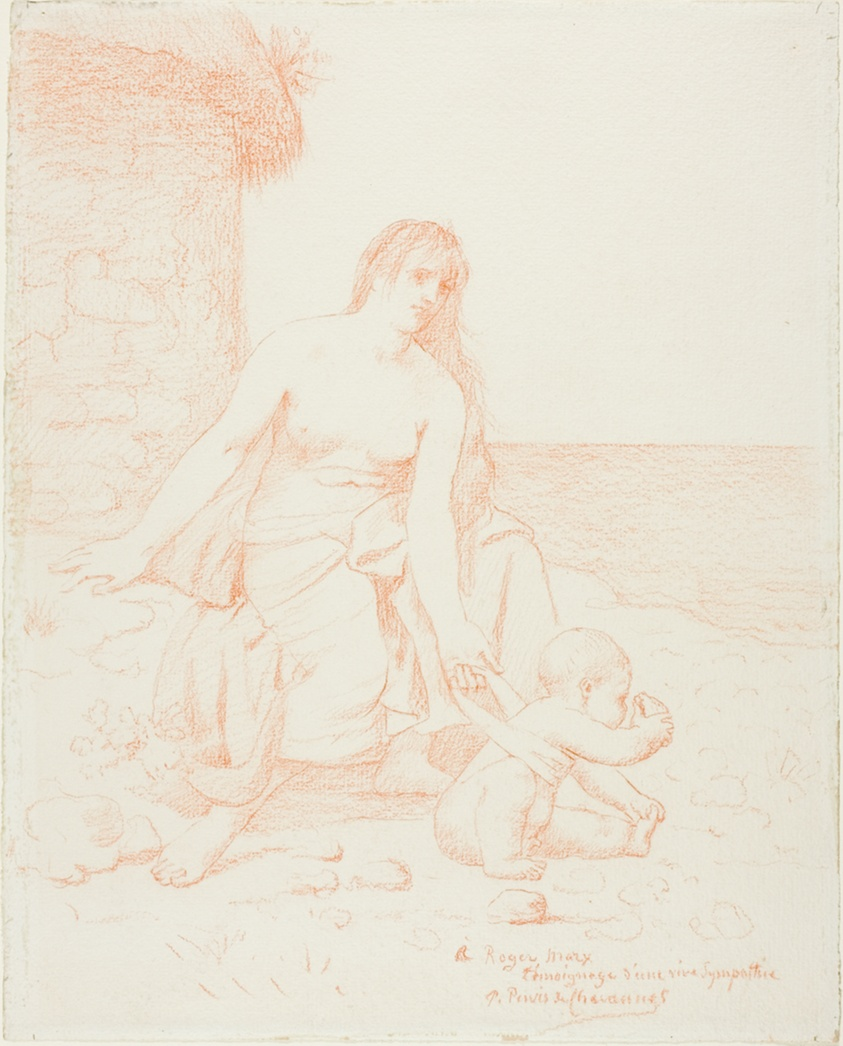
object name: Drawing and Watercolor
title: Fisherman's Family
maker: Pierre Puvis de Chavannes (French, 1824-1898)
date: c. 1883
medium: Red chalk on ivory wove paper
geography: France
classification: chalk; drawings (visual works); prints and drawing